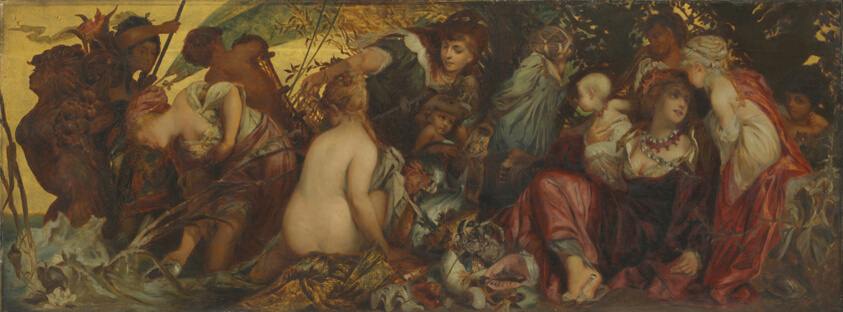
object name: Painting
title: Treasures of the Sea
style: nineteenth century, 19th century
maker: Hans Makart (Austrian, 1840–1884)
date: c. 1870/75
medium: Oil on canvas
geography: Austria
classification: painting; oil on canvas; oil paintings (visual works); paint; european painting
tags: sea, necklace, pearls, weapons, spears, textile, boats, net, fish, fishing, nudes, jewelry, foliage, water, children, women